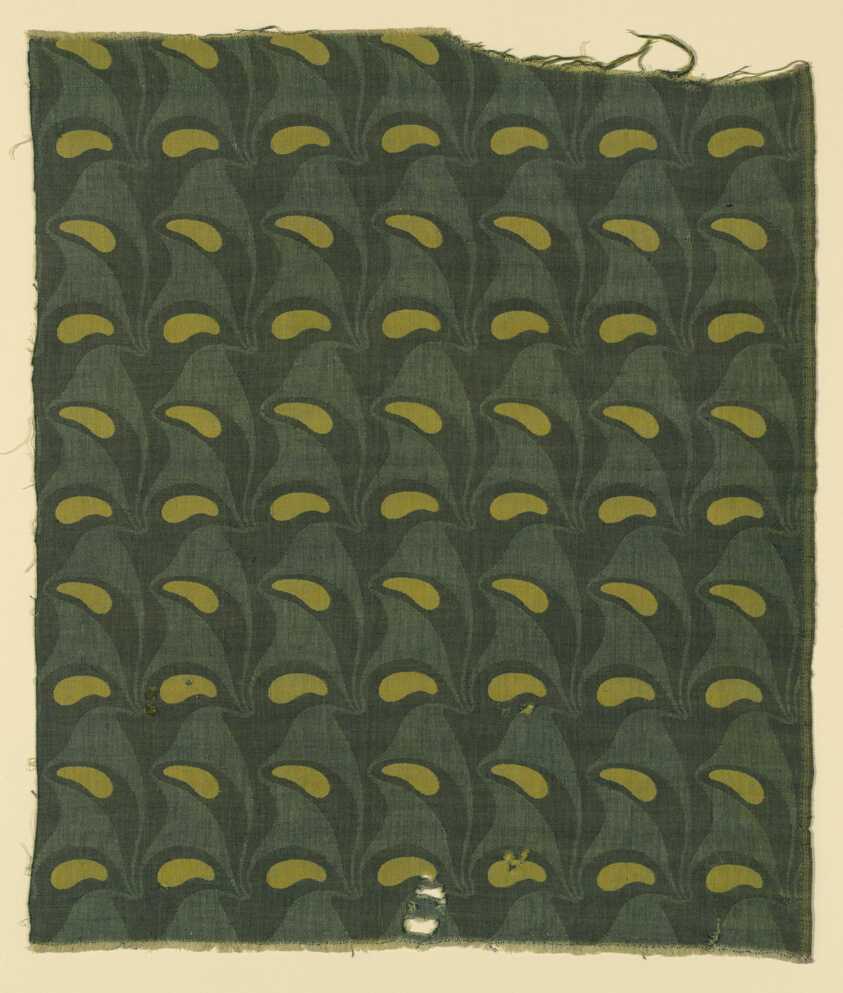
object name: Textile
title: Panel (Upholstery Fabric)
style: Modernism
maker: Designed by Koloman Moser Schule (Austrian, 1868–1918); Produced by Johan Backhausen & Söhne; Austria, Vienna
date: c. 1902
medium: Cotton, plain weave; double cloth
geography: Vienna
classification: textile; weaving